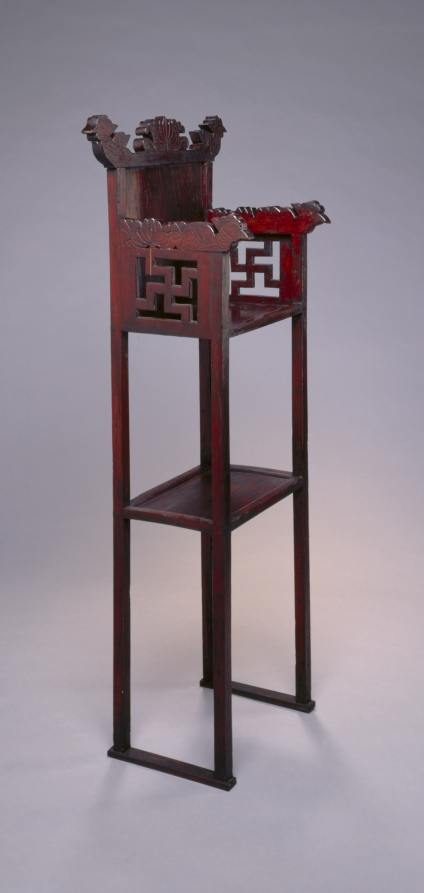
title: Altar High Chair (Kyo-Yi)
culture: Korea, Joseon dynasty (1392–1910)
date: 1800s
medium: pine nut wood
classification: Furniture and woodwork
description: Many homes in premodern Korean society had a memorial shrine for preparing and holding ancestral rites. Placed on the top of a tall chair, this miniature edifice (called the spirit house) served as a temporary residence for visiting ancestral spirits. On the table, a variety of delicacies such as fruits, rice, meat, and wine would be placed to treat those spiritual guests.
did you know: The belief in two types of souls, the spiritual and the corporeal, embodied the core concept of ancestral worship in traditional China and Korea. While the corporeal soul is believed to reside in the tomb, the spiritual soul, in the spirit house, guards his or her descendants.